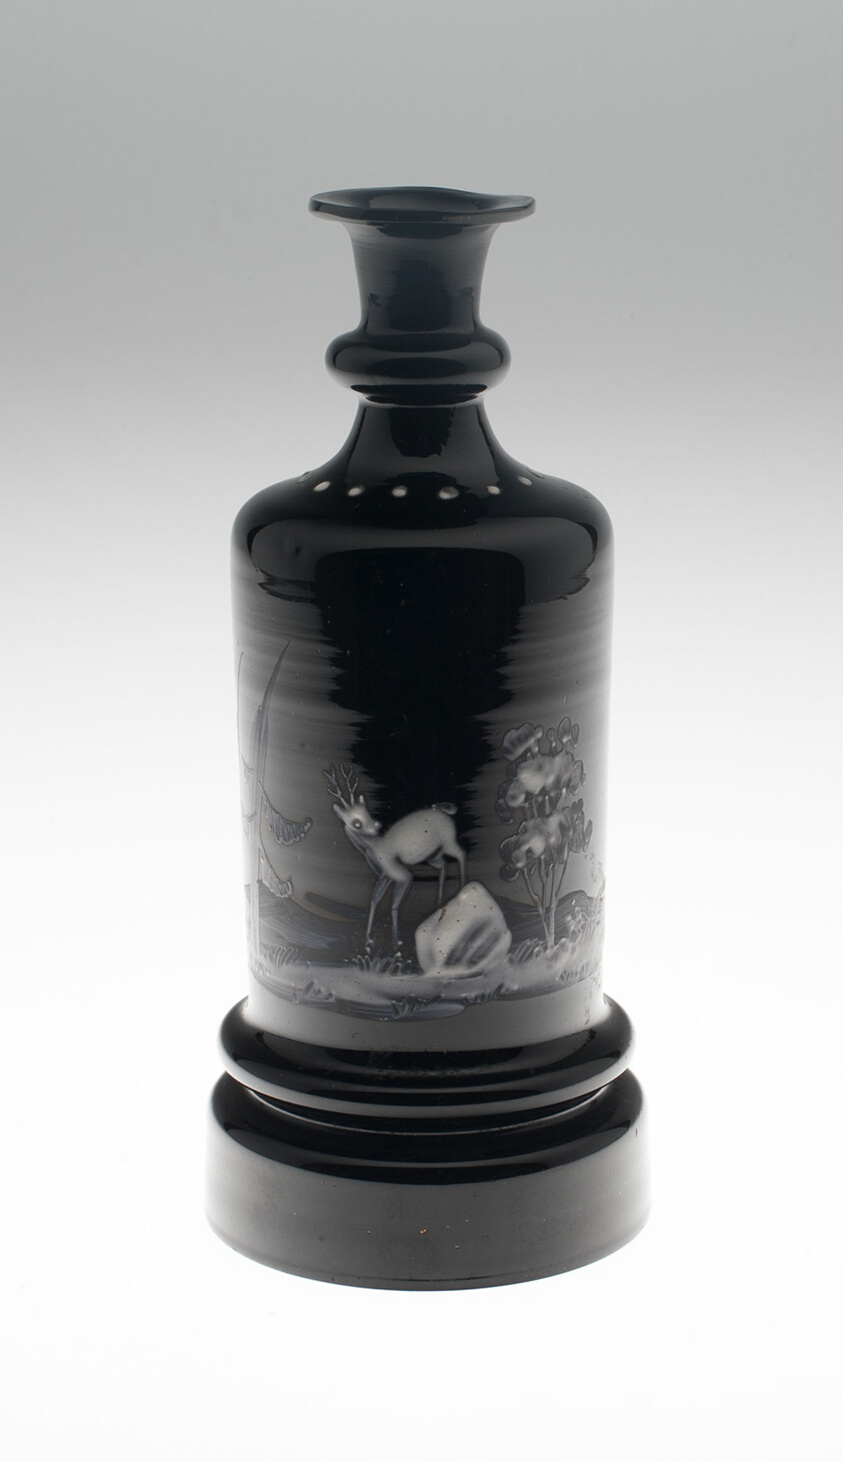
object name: Glass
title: Bottle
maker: Bohemia, Czech Republic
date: c. 1825/40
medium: Glass; black, blown, cut and enamelled with white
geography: Bohemia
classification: glass; european decorative arts